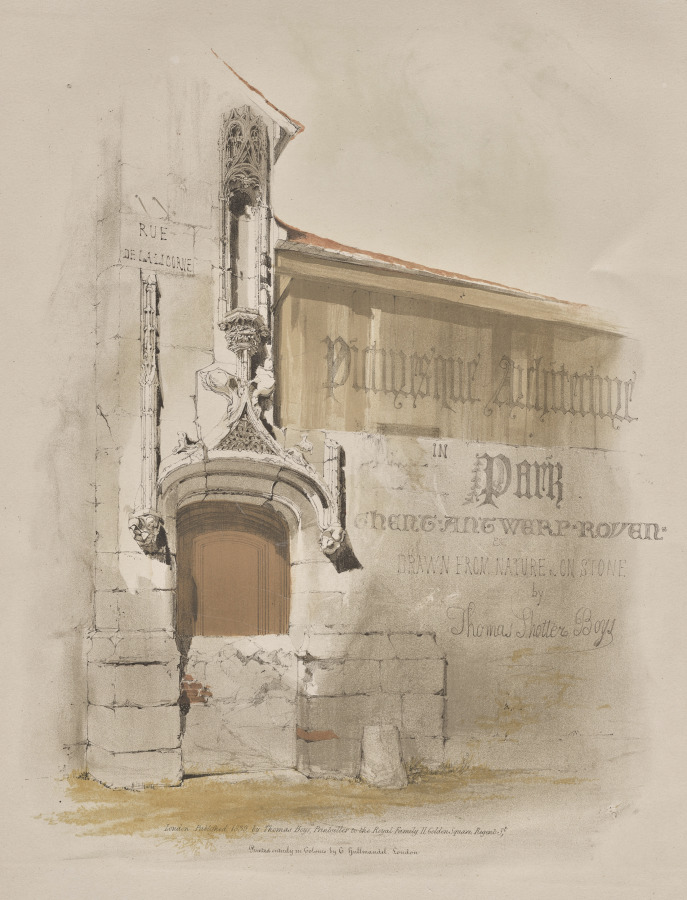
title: Picturesque Architecture in Paris, Ghent, Antwerp, Rouen: Rue de La Licorne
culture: England, 19th century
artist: Thomas Shotter Boys (British, 1803–1874)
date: 1839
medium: lithograph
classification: Portfolio